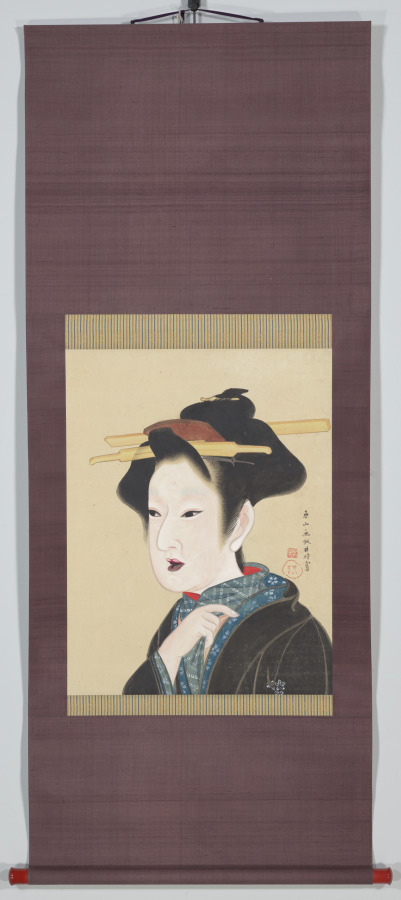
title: A Beauty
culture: Japan, Edo period (1615–1868)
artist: Gion Seitoku (Japanese, active late 1700s–early 1800s)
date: early 1800s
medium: hanging scroll; ink and color on paper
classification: Painting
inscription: 東山画奴井特寫 「字日伯立」白文方印・「せいとく」朱文千鳥印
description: A Kyoto-based ukiyo-e painter, Gion Seitoku specialized in portraying women from Gion and Shimabara, licensed brothel districts in that city. He was known for detailing faces with subtle modeling to heighten a sense of realism. During the 1700s and 1800s, wearing iridescent, greenish lip gloss made from safflower was in vogue. In addition, Japanese women almost universally practiced the custom of artificially blackening their teeth with a stain.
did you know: The person's lipstick is made from safflower.